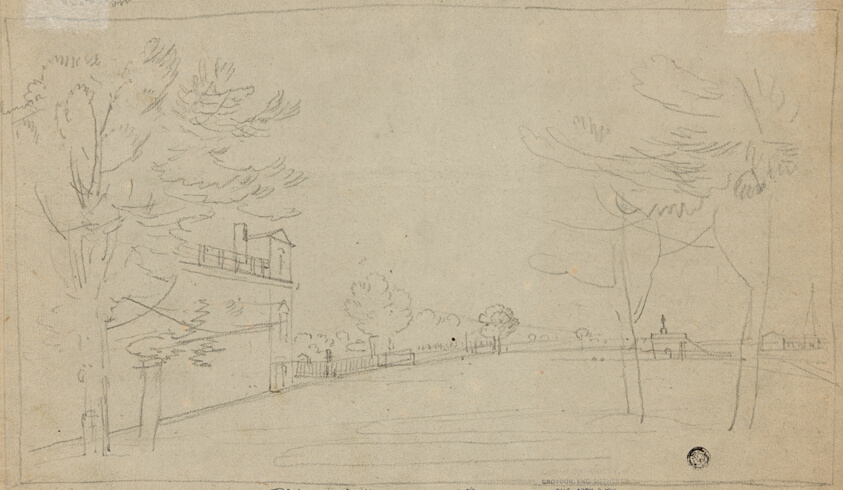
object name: Drawing and Watercolor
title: View of Wilson House and Gardens (recto); View of Wilson House and Gardens (verso)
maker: Richard Wilson (English, 1714-1782)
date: 1760/69 (recto); n.d. (verso)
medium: Black chalk (recto and verso) on gray laid paper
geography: England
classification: chalk; drawings (visual works); prints and drawing